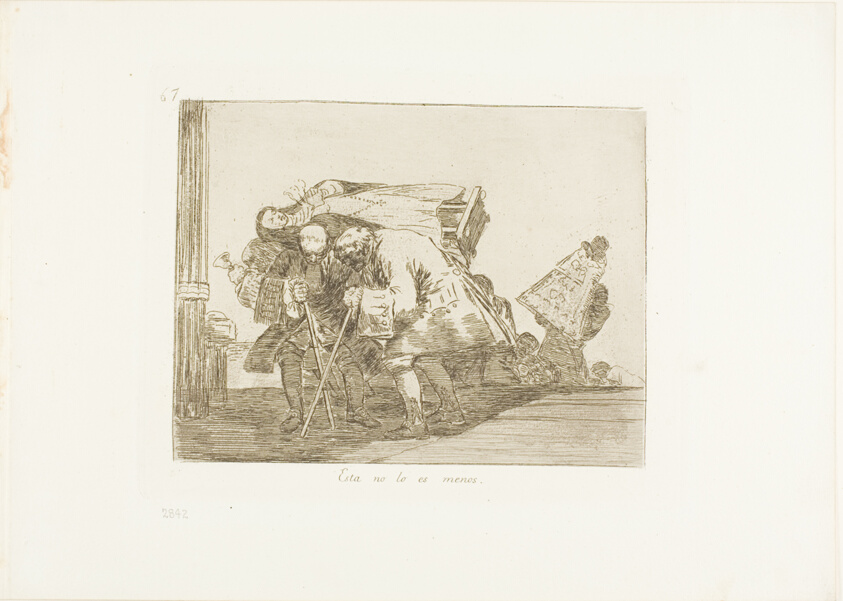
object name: Print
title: This is Not Less so, plate 67 from The Disasters of War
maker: Francisco José de Goya y Lucientes (Spanish, 1746-1828)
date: 1815/20, published 1863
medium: Etching with aquatint and drypoint in warm black on off-white wove paper with gilt edges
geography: Spain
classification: etching; print; prints and drawing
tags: war